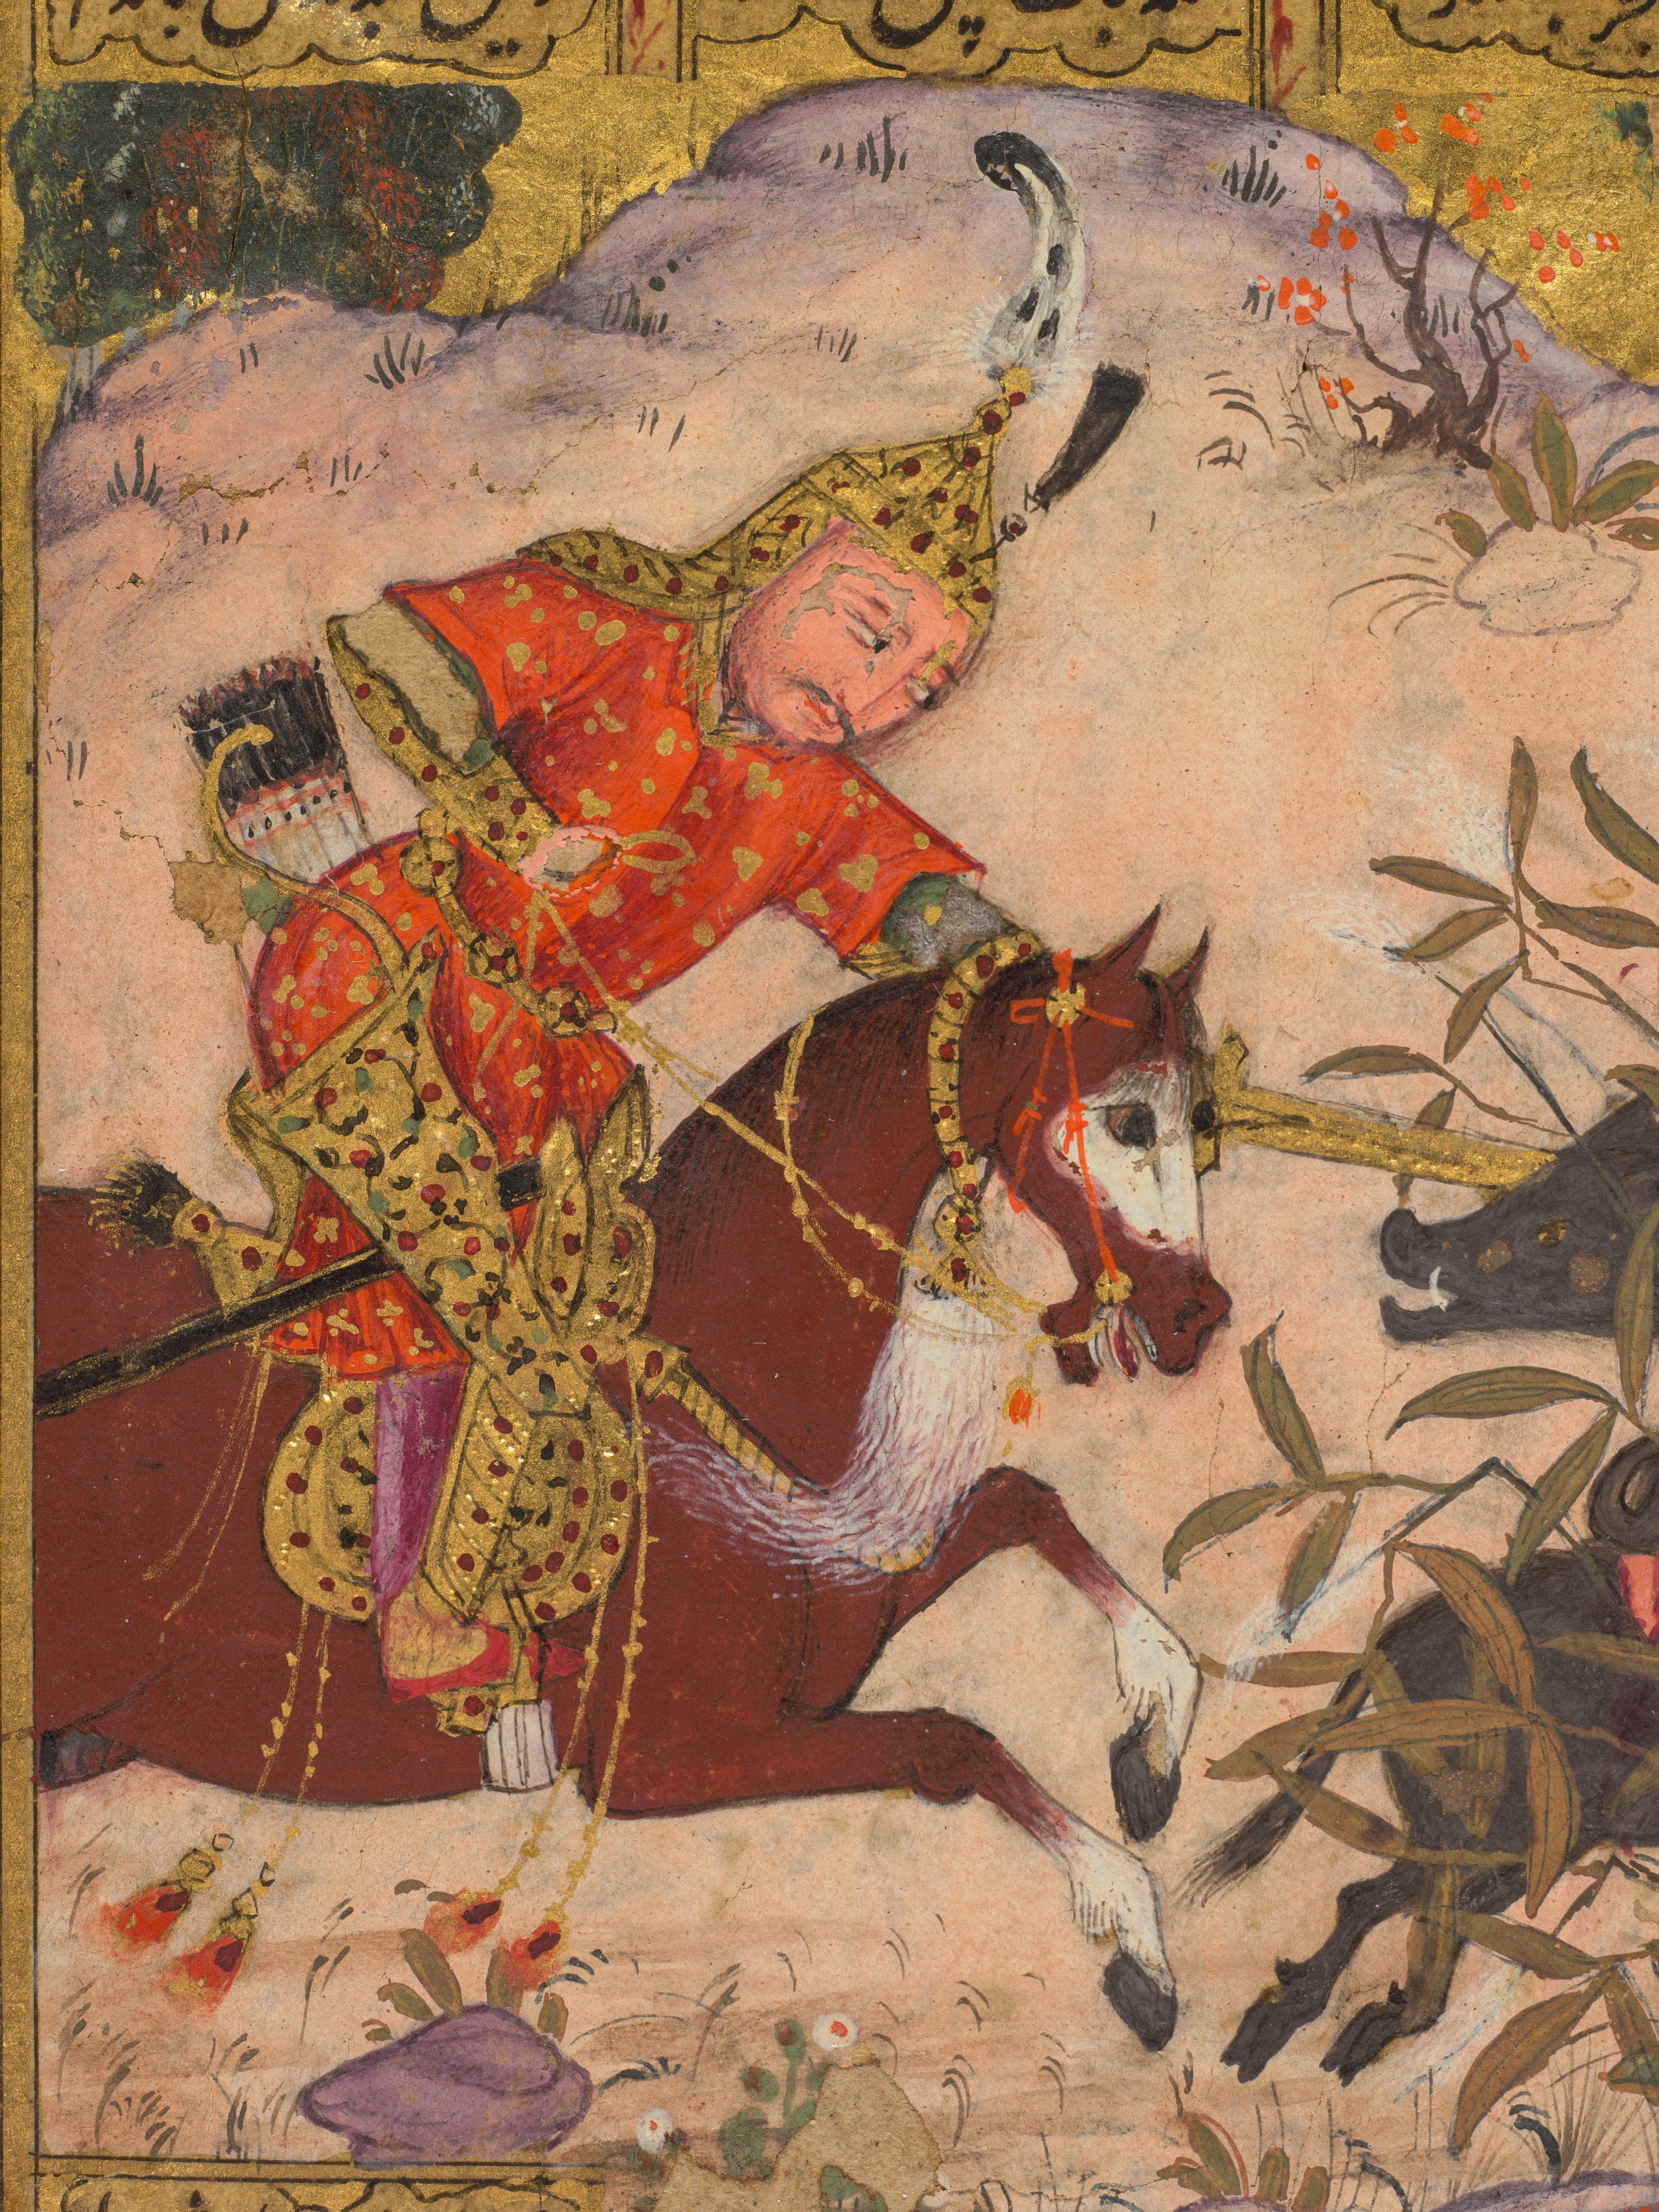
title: Bijan killing the wild boars of Irman, from a Shah-nama (Book of Kings) of Firdausi (Persian, about 934–1020), (recto)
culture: India, Bijapur, Deccan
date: c. 1610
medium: Gum tempera, ink, and gold on paper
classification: Painting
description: This illustrated page from a Shah-nama depicts the first adventure of the hero Bijan, son of an Iranian knight. When reports arrived at the king’s court of wild boars ravaging the borderlands between the enemy realms of Iran and Turan, Bijan volunteered to hunt and kill the beasts, much to the chagrin of his father, who doubted his young son’s ability to navigate the politically volatile situation. The fearless Bijan is shown on horseback as he singlehandedly strikes down on the bodies of the wild boars in the brush. After overzealously celebrating his success, Bijan must be rescued from a pit by Rustam. This early manuscript from the Deccan made for the sultan of Bijapur is characterized by glowing colors and lavish use of gold.